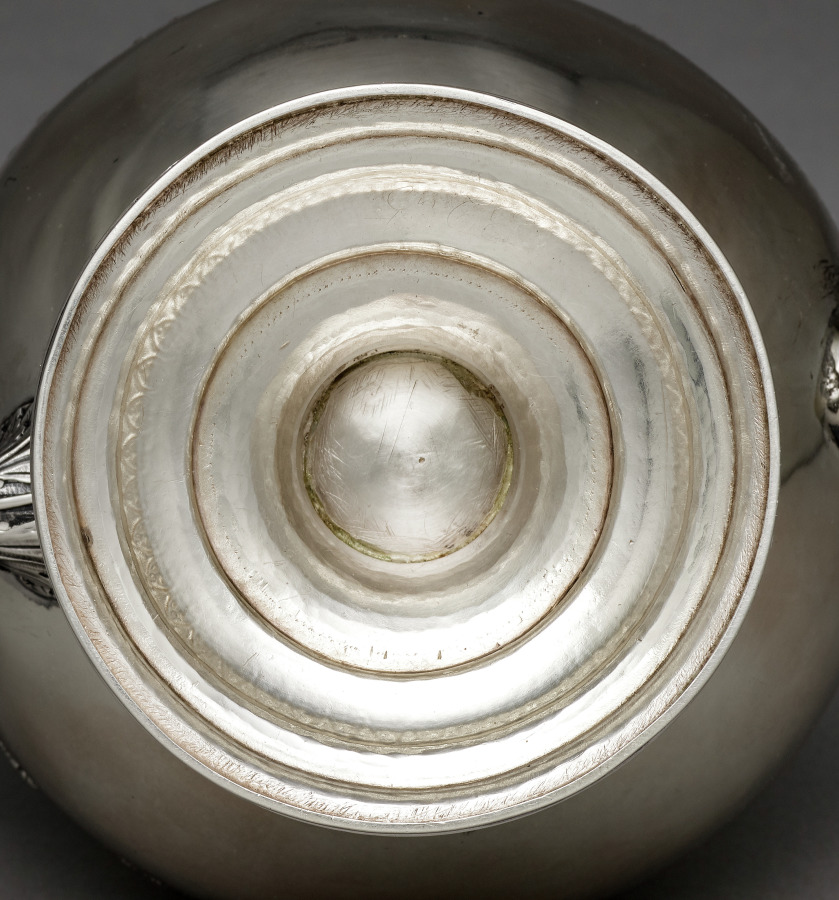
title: Covered Pot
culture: America, Pennsylvania, Philadelphia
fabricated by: after a design by Harvey Lewis (American, 1835)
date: c. 1811–25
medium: silver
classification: Silver